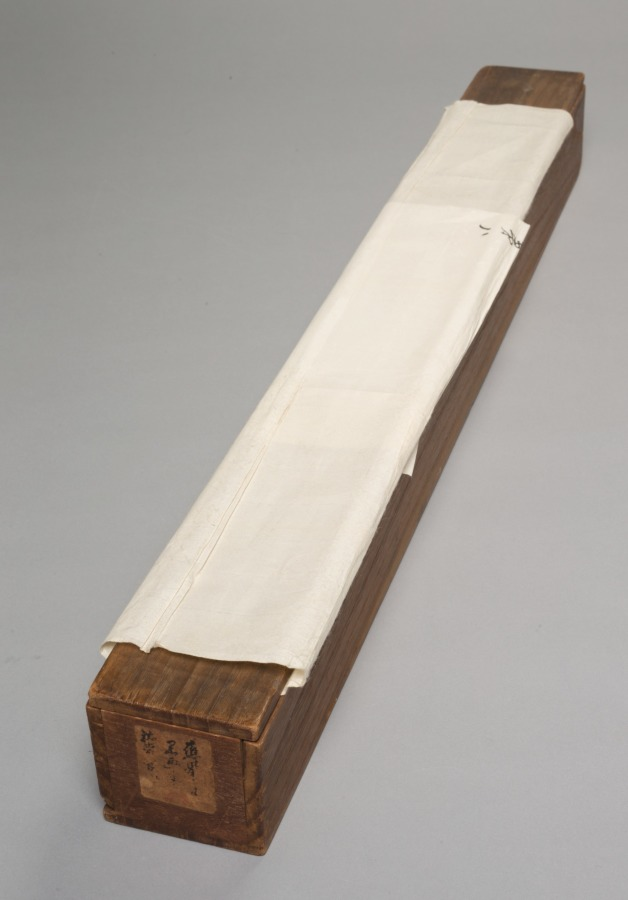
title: Tiger in Wind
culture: Japan, Edo period (1615–1868) to Meiji period (1868–1912)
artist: after Maruyama Ōkyo (Japanese, 1733–1795)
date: 1800s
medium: hanging scroll; ink on paper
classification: Painting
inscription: 「秋空一鶴」賛 長嘯一聲風括地「月渚」朱文方印「祐常之章」白文方印 壬辰初冬寫応挙 「應舉之印」白文方印・「仲選」白文方印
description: The seals appended to the inscription on this painting suggest that the text was brushed by Yūjō (1723–1773), an imperial prince who became a Buddhist monk and was abbot of Enman'in at Miidera. The line is from a poem attributed to a Yuan dynasty poet, Yu Ruyu (dates unknown), and describes the sound of a fierce wind lashing the ground. Wind is associated with the roar of the tiger. Yūjō was Maruyama Ōkyo's most important patron as a young artist, and this painting has a signature asserting that Ōkyo created it in 1772, the year before Yūjō's death. While Yūjō produced a preface for a now famous set of handscrolls he commissioned Ōkyo to paint, and a number of Ōkyo's compositions for Enman'in survive, this work would appear to be one imagining their relationship, as opposed to a genuine piece.